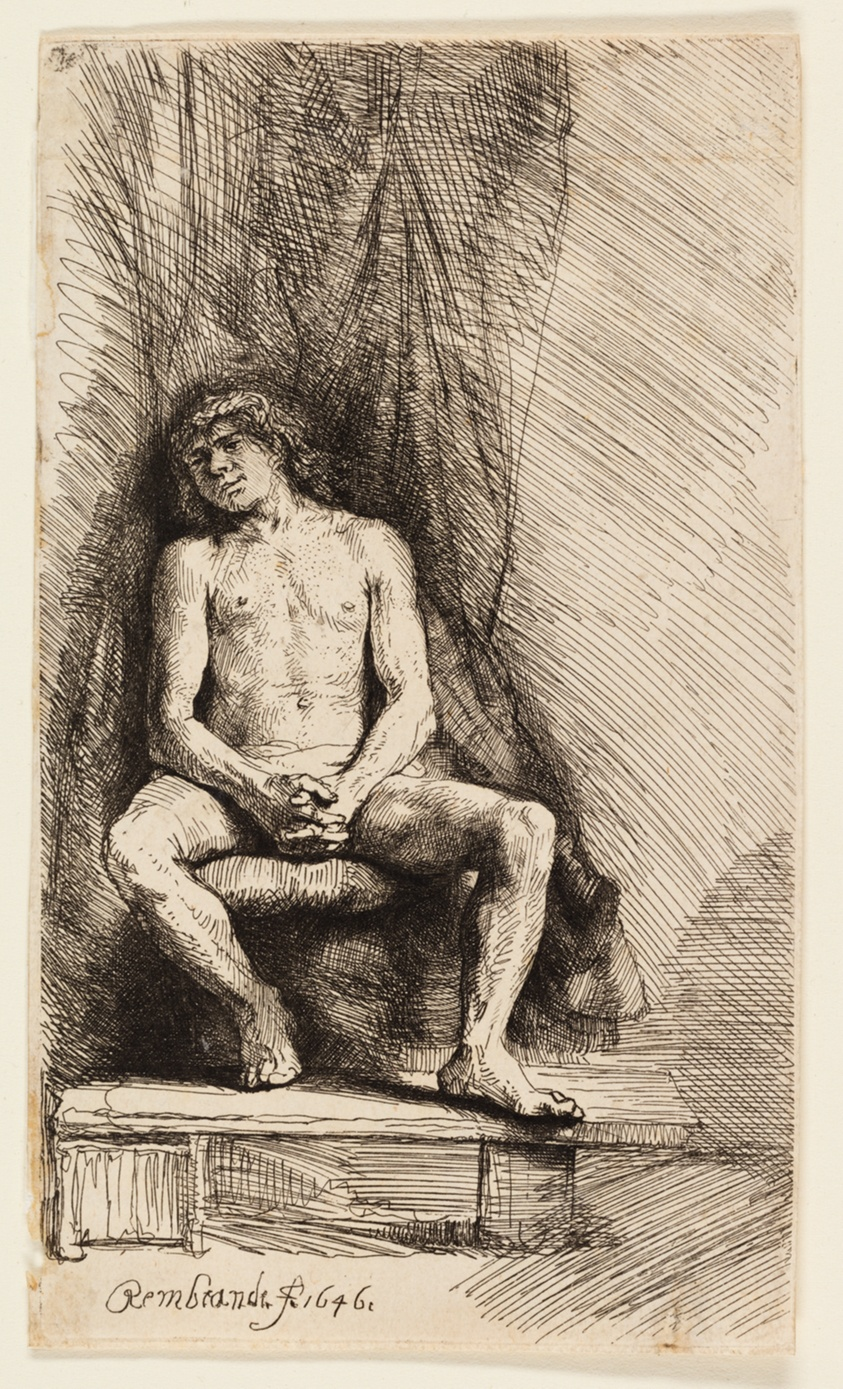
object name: Print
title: Nude Man Seated before a Curtain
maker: Rembrandt van Rijn (Dutch, 1606-1669)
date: 1646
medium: Etching on ivory laid paper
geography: Holland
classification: etching; print; prints and drawing; paper